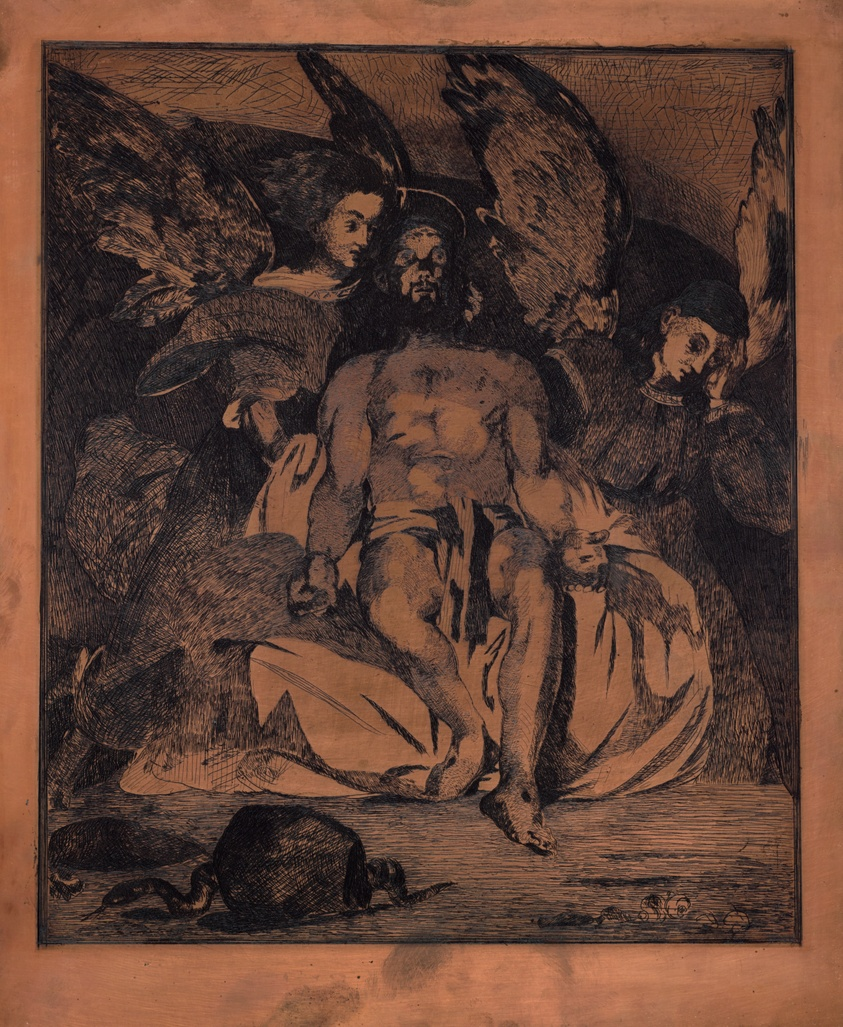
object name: Print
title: Dead Christ with Angels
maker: Édouard Manet (French, 1832-1883)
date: 1866-67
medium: Copperplate, etched and aquatinted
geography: France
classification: etched plate; matrix; prints and drawing; print